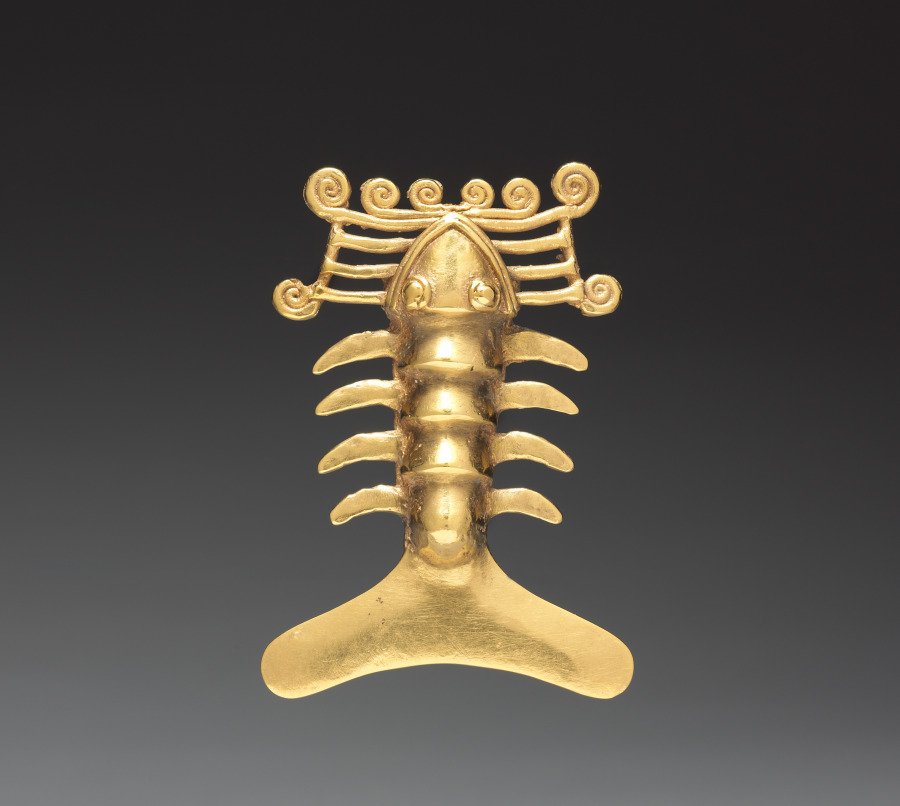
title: Lobster Pendant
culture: Costa Rica, Diquís region, 11th-16th century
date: c. 1000–1500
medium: cast gold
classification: Metalwork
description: Among the pendants shown here are a crustacean (1943.290), an animal-headed figure (1948.18), and two pendants featuring birds (1951.442 and 1946.223). The latter were dubbed aguilas (eagles) by Christopher Columbus, who saw natives wearing them as necklace ornaments. Modern researchers are not as sure of the species shown, but some believe that they are birds of prey because talons and beaks are prominent and often clutch something, in one example here a small, disembodied head that holds a clapper. In both examples, two tufts in the form of crocodiles in profile flank the birds’ heads.